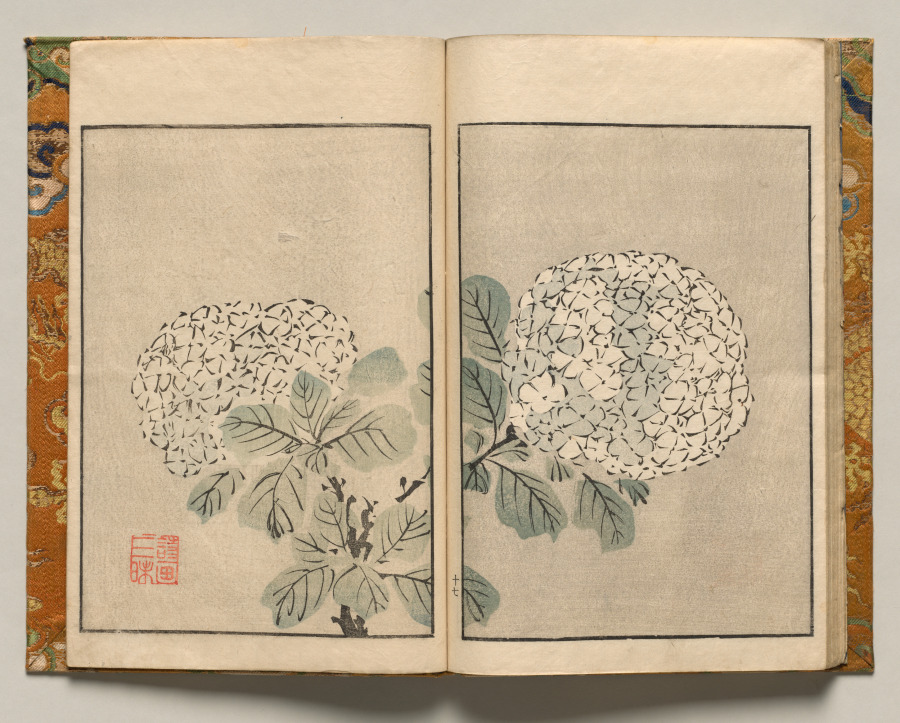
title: Hydrangea, Design Seventeen from Shazanrō Picture Book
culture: Japan, Edo period (1615–1868)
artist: Tani Bunchō (Japanese, 1763–1841)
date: 1816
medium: woodblock-printed book; ink and color on paper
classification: Bound Volume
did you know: Shazanrō was one of Tani Bunchō's style names.